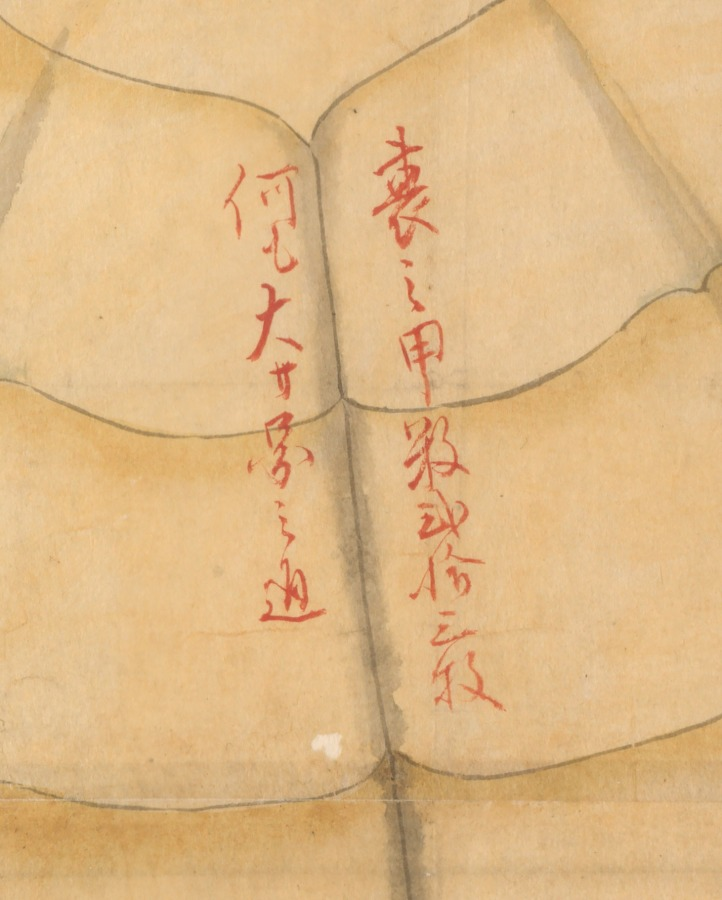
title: Tortoise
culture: Japan, Edo period (1615–1868)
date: 1700s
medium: watercolor on paper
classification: Painting